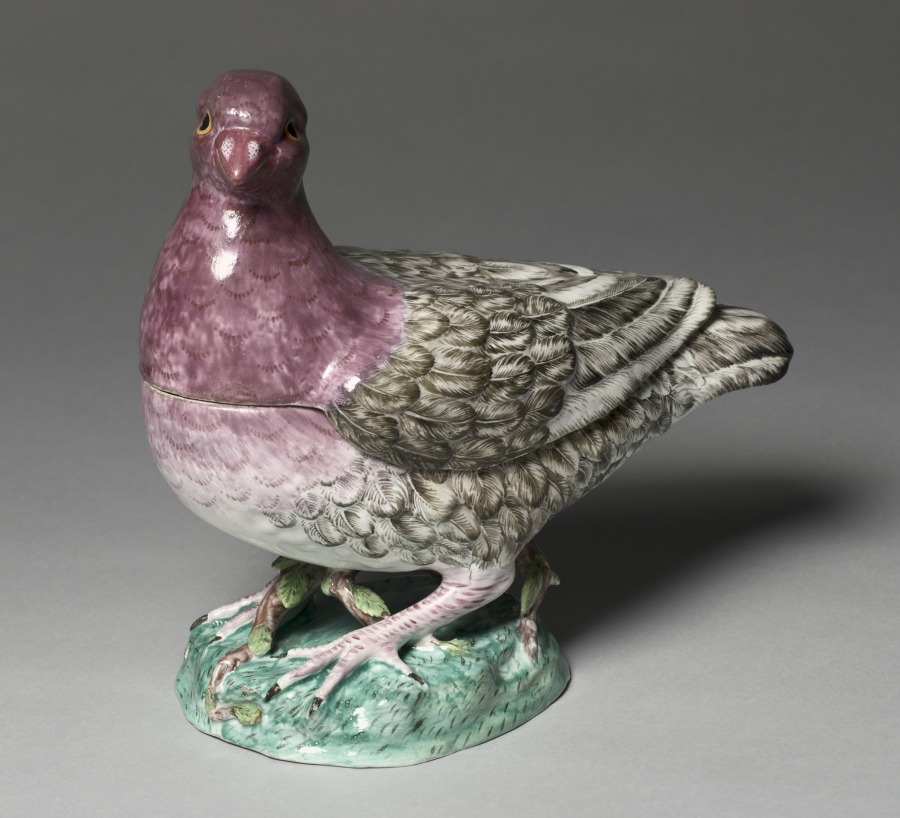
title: Covered Tureen in the Form of a Pigeon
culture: France, 18th century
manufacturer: Sceaux Factory (French, active 1748–66)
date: c. 1760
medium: Tin- glazed earthenware (faience) wth enamel decoration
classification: Ceramic